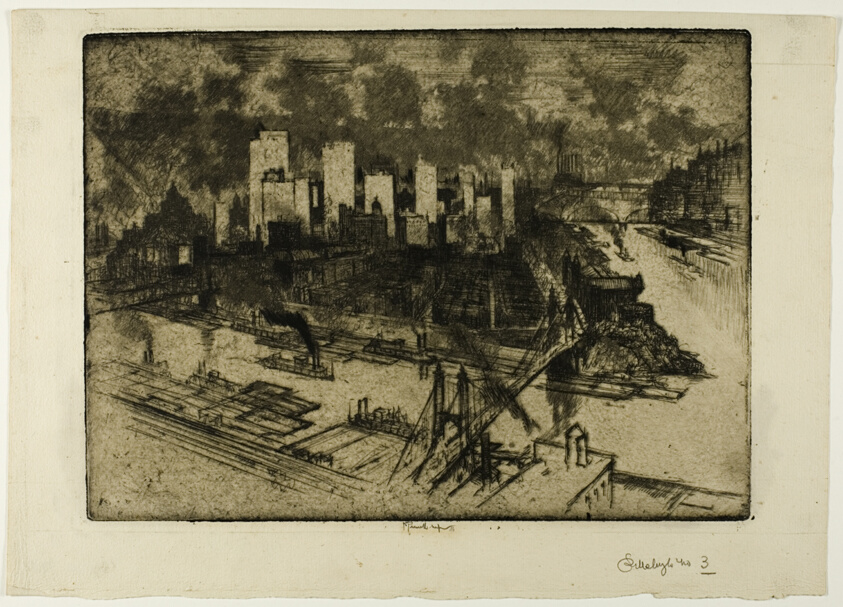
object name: Print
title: Pittsburgh, No.3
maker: Joseph Pennell (American, 1857-1926)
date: 1909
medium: Etching on ivory laid paper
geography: United States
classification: etching; print; prints and drawing